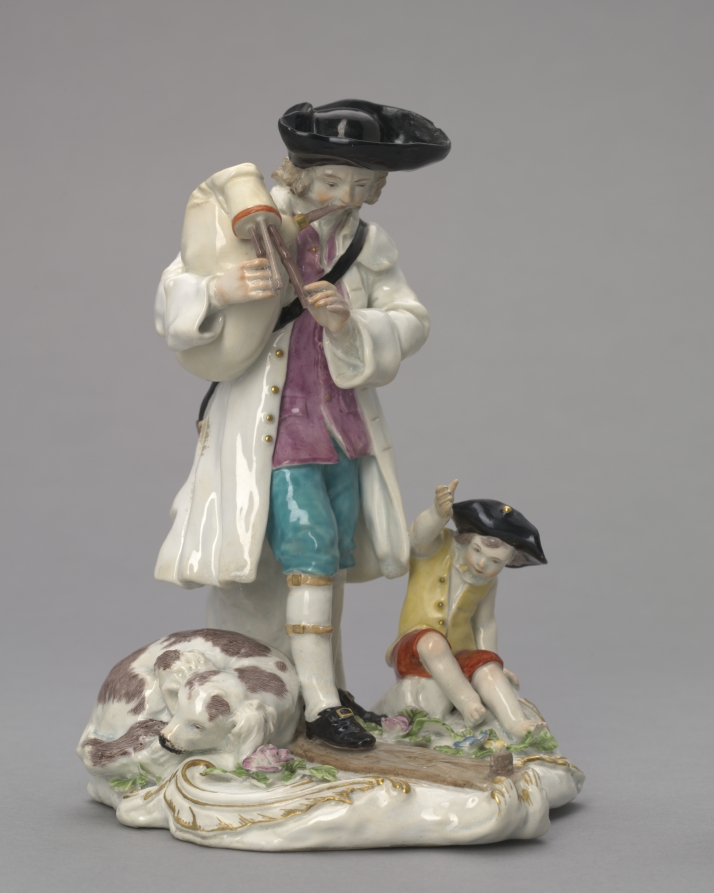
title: The Itinerant Musician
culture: England, Chelsea, 18th century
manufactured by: Chelsea Porcelain Factory (Britain, London, 1745–84)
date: c. 1756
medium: soft-paste porcelain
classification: Ceramic